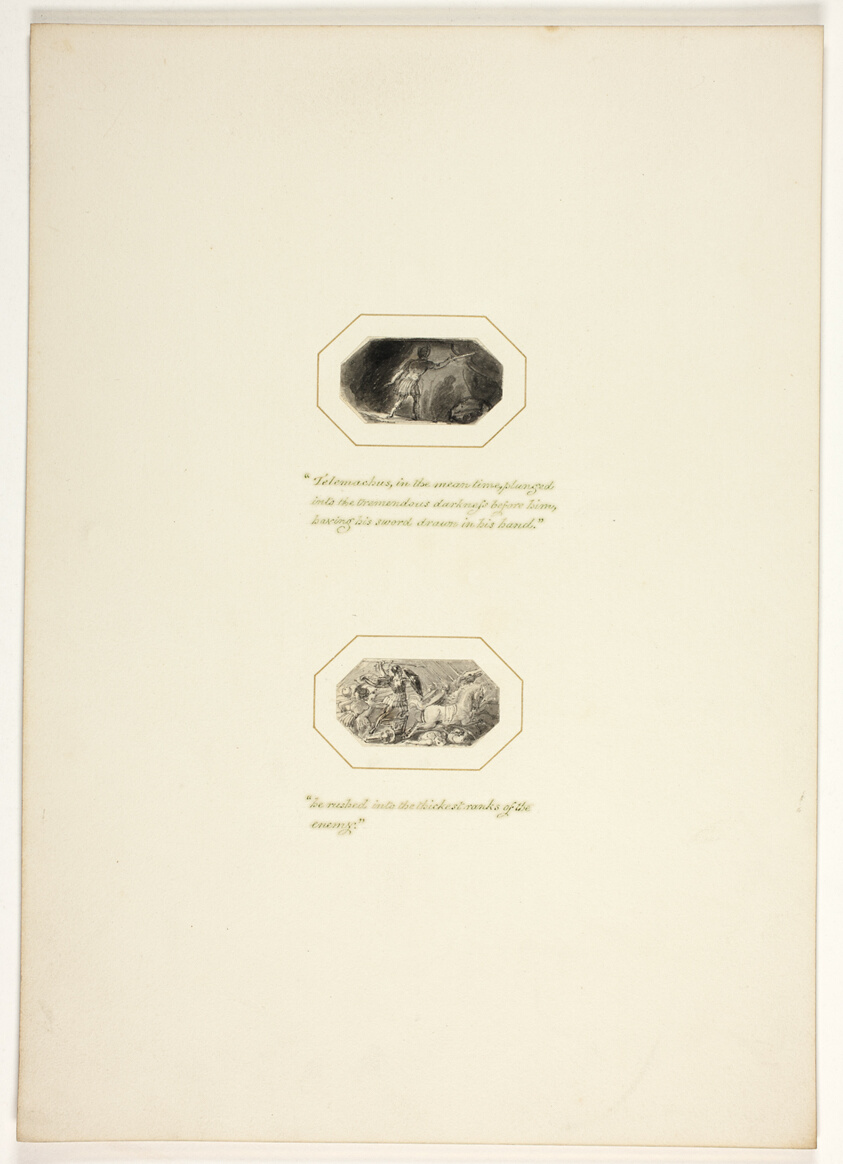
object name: Drawing and Watercolor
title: Study for a plate from Telemachus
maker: Thomas Stothard (English, 1755-1834)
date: c. 1797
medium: Ink wash on paper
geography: England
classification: ink or chalk wash; drawings (visual works); prints and drawing